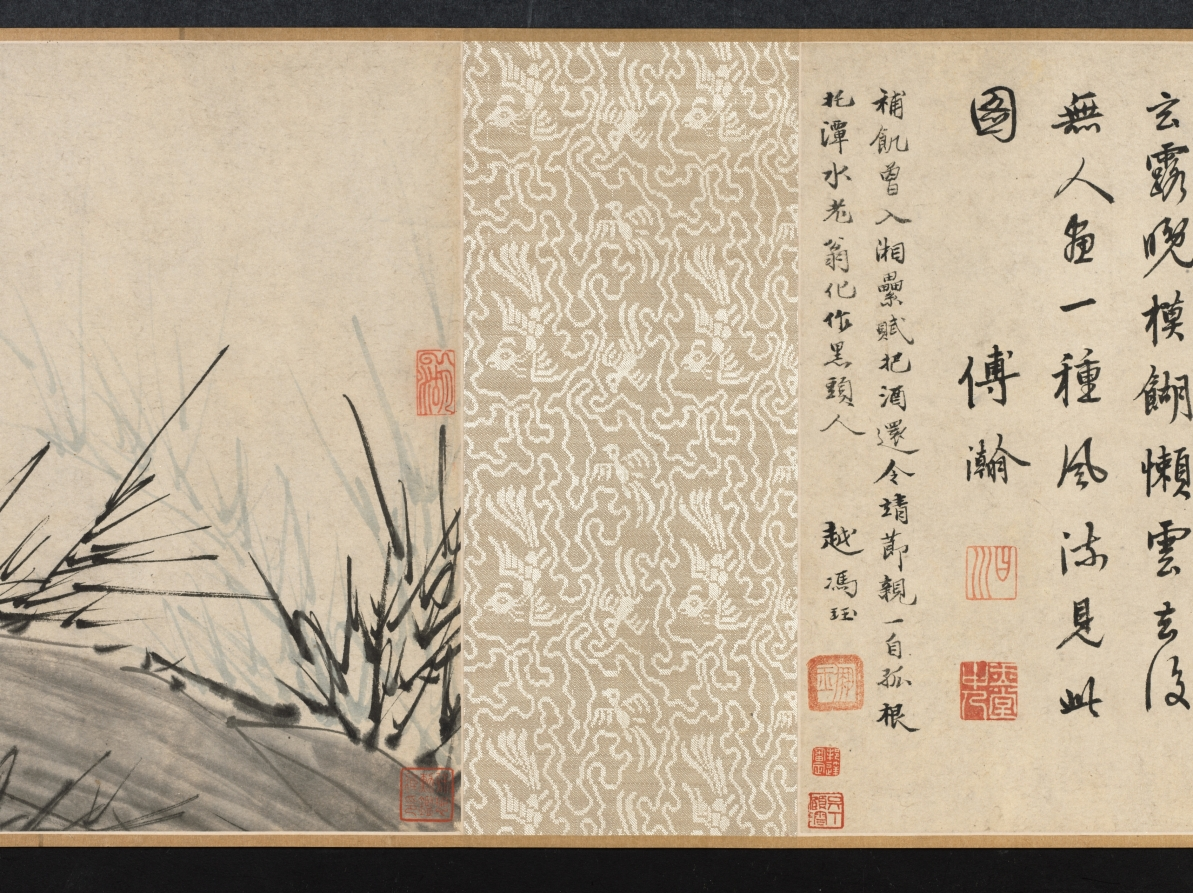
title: Chrysanthemums and Cabbage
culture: China, Ming dynasty (1368–1644)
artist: Tao Cheng (Chinese, active c. 1471–after 1502)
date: c. 1486 or before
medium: handscroll, ink and slight color on paper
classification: Painting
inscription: Artist's seal at beginning of painting: Yun hu 雲湖. Title by Wang Wenzhi 王文治 (1730–1802), date 1756. 2 seals of Wang Wenzhi 王文治 (1730-1802); 3 seals of Ku Yün (n. d.)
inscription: Section A (Chrysanthemums): 1 poem and 1 seal of Zhang Yuanzhen 張元禎 (1437–1507) - Jinshi, 1461; 1 poems and 3 seals of Ni Yue 倪岳 (1444–1501) - Jinshi, 1464; 1 poems and 2 seals of Zhao Xiang 趙祥 (life dates unknown) - Jinshi, 1469; 1 poems and 1 seals of Wu Xixian 吳希賢 (1437–1489) - Jinshi, 1464; 1 poems and 1 seals of Lü Chang 呂㦂 (1449–1511) - Juren, 1471; 1 poems and 3 seals of Fu Han 傅瀚 (1435–1502) - Jinshi, 1464; 1 poems and 1 seals of Feng Jue 馮珏 (life dates unknown) - Jinshi, 1478.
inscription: Chrysanthemums section, poem 1, by Zhang Yuanzhen 張元禎 (1437–1507): Several bushes of chrysanthemums grow in front of the Five-Willow Cottage,/ The yellow ones are really yellow and the white ones white./ This affable and decent fellow, young in years and unsophisticated,/ Has snapped one of the branches to dip in ink. (The Five-Willows Cottage was the home of the poet Tao Qian 陶潛 (Tao Yuanming 陶淵明, AD 365-427).) Chrysanthemums section, poem 2, by Ni Yue 倪岳 (1444–1501): Where at the Eastern Fence can you grieve for the Soul of the Xiang River?/ A man of upright character is mourned within the traces of ink./ White jade with a slight flaw would be a grievance forever,/ Later men should understand why even the roots of the flowers are washed. (Eastern Fence refers again to the poet Tao Qian 陶潛, while the Soul of the Hsiang River refers to the poet Qu Yuan 屈原 (c. 340–278 BC).) Chrysanthemums section, poem 3, by Zhao Xiang 趙祥 (life dates unknown): A clump of chrysanthemum grows in front of the bamboo pavilion,/ The winds of many autumns have blown since we parted beyond the river./ Straining wine through the official's cap of Tao [Qian] to prolong autumn's pleasures,/ The mists and clouds of ten thousand miles belong to the intoxicated. Chrysanthemums section, poem 4, by Wu Xixian 吳希賢 (1437–1489): It is a different spring if mulberry is planted during the latter part of the year,/ The dust of the world originally did not drop on clothing./ Who spills out ink under the Eastern Fence/ And paints so freely this portrait of chrysanthemums for the venerable Sir Tao? Chrysanthemums section, poem 5, by Lü Chang 呂㦂 (1449–1511): This full tray of ink for painting [flowers] at the Eastern Fence;/ Their whiteness or yellowness is not essential in capturing their beauty./ I don't have to go to Jiangnan to see them myself./ At my old house grow two or three branches. Chrysanthemums section, poem 6, by Fu Han 傅瀚 (1435–1502): Who daubed autumn flowers with ink/ As if they were dark dew on a branch tip only vaguely seen at evening?/ After the lazy clouds disperse, no one paints;/ A certain unconventionality pervades this painting. Chrysanthemums section, poem 7, by Feng Jue 馮珏 (life dates unknown): To satisfy his hunger, [the chrysanthemums] have at times entered the poetry of Qu Yuan;/ Taking up the wine cup, it felt close to Tao Qian./ [With them I am like] a lonely root sustained by deep water/ Or an old man to whose hair the color of youth returns.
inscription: Section B (Cabbage): 1 poem and 1 seal of Cai Qi 蔡圻 (life dates unknown) - degree information not known; 1 poems and 3 seals of Ni Yue 倪岳 (1444–1501) - Jinshi, 1464; 1 poem and 3 seals of Jiao Fang 焦芳 (1436–1517) - Jinshi, 1464; 1 poem and 3 seals of Li Dongyang 李東陽 (1447–1516) - Jinshi, 1464; 1 poems and 1 seals of Wu Xixian, signed “Xixian” 吳希賢 - Jinshi, 1464; 1 poems and 3 seals of Fu Han 傅瀚 (1435–1502) - Jinshi, 1464; 1 poems and 1 seals of Lü Chang 呂㦂 (1449–1511) - Juren, 1471; 1 poems and 2 seals of Zhao Xiang 趙祥 (life dates unknown) - Jinshi, 1469; 1 poems and 1 seals of Feng Jue 馮珏 (life dates unknown) - Jinshi, 1478.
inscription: Cabbage section, poem 1, by Cai Qi 蔡圻 (life dates unknown): The ink splashes are fresh from a frosty brush dipped in pond water;/ I can visualize that time when Yunhu 雲湖 [Tao Cheng] first showed his talents./ I lament the places where I scribbled before,/ Who would open them to inscribe a poem? (The first line is an allusion to the famous Jin dynasty calligrapher Wang Xizhi 王羲之 (AD 303-361), who practiced calligraphy so diligently at the edge of a pond that the water turned black with ink.) Cabbage section, poem 2, by Ni Yue 倪岳 (1444–1501): After rain the vegetables begin to grow;/ How are the colors of the masses lately!/ Once you get used to them, the tastiest parts are the ends of the roots;/ I don't know if they can be used for "seasoning soup." ("Seasoning soup" is an allusion to the statesmanship of a chief minister.) Cabbage section, poem 3, by Jiao Fang 焦芳 (1436–1517): This crop of purple stalks and green leaves is late and irregular;/ Now the rainy season is over for the Eastern Garden./ All the nobles nowadays dine on meat;/ Who of them knows the flavor of this [cabbage]. Cabbage section, poem 4, by Li Dongyang 李東陽 (1447–1516): It's always helped the honest man to sober up after drinks./ I intend to go to the deepest part of the stream-crossed garden/ To refresh myself in the fragrance and dew of evening. Cabbage section, poem 5, by Wu Xixian 吳希賢 (1437–1489): After rain, the white silk is filled with fragrant vegetables;/ How many times this happens in Mr. Tao's paintings./ On whom will you depend to present a memorial to the ruler?/ Don't let this color emerge on the faces of the people. (The last line is meant as a warning to officials: the color of the vegetables (green) may be pleasing in itself, but when it emerges on the faces of the starving poor, it signifies a badly governed world.) Cabbage section, poem 6, by Fu Han 傅瀚 (1435–1502): For twenty years I have feasted on the excellent mutton of an official;/ Yet I talk and dream about the garden and its vegetables./ Do not merely say it is good to chew the root of the cabbage--/ You must taste to understand what poverty is. Cabbage section, poem 7, by Lu Chang 呂㦂 (1449–1511): The capital is never a place for an apprentice in the "garden of scholarship."/ Who would write about gardens and vegetables on an examination paper?/ I've walked throughout the country in spring;/ Make sure the people don't show this color. Cabbage section, poem 8, by Zhao Xiang 趙祥 (life dates unknown): After a wash of rain, the spring garden is still in order;/ The flavor [of the cabbage] is more suitable with a small drink and the hum of a tune./ The rich and powerful in their mansions consume dish after dish of meat;/ Vegetarian food is known only by the scholars. Cabbage section, poem 9, by Feng Jue 馮珏 (life dates unknown): A new cabbage is nourished with dew;/ It takes a long time to grow and mature./ The business of "seasoning the soup" is your responsibility;/ Better command the gardener to take care [of the cabbages]. trans. HK/LYSL/WKH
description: On an autumn day in Beijing, Tao Cheng had a gathering with a group of scholar-officials and created two paintings in a spontaneous, casual style. The first depicts chrysanthemums, slender bamboo stalks, and a rock in monochrome ink. Tao applied light colors for the second painting that depicts cabbage. Tao deliberately placed the images on the first sections of the paper so that his honorable guests could add their poetic inscriptions inspired by his imagery. In the first section to the right, all seven poetic inscriptions refer to the beloved poet and recluse Tao Qian (also called Tao Yuanming, AD 365–427) who was particularly known for his profound love for chrysanthemum flowers. Most of the inscriptions in the second section express sympathy for the poor, since cabbage is the main ingredient in their humble food. Taken together, the poems and paintings allude to the life and responsibilities of the scholar-official: the importance of both an upright character and a concern for the poor citizens in order to achieve good government.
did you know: Eminent calligrapher Wang Wenzhi 王文治 was only 27 sui when he wrote the title in 1756.